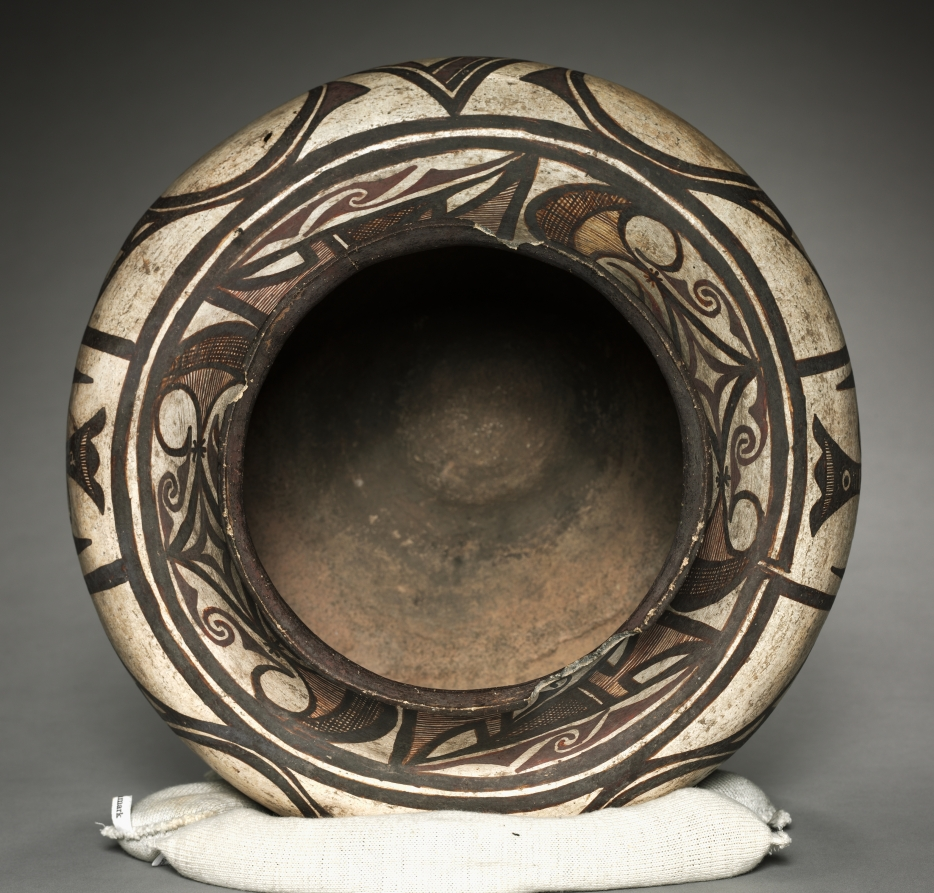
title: Water Jar (Olla)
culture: Southwest,Pueblo, Zuni, Post-Contact Period, late 19th century - early 20th century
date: 1880–1900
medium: ceramic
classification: Ceramic